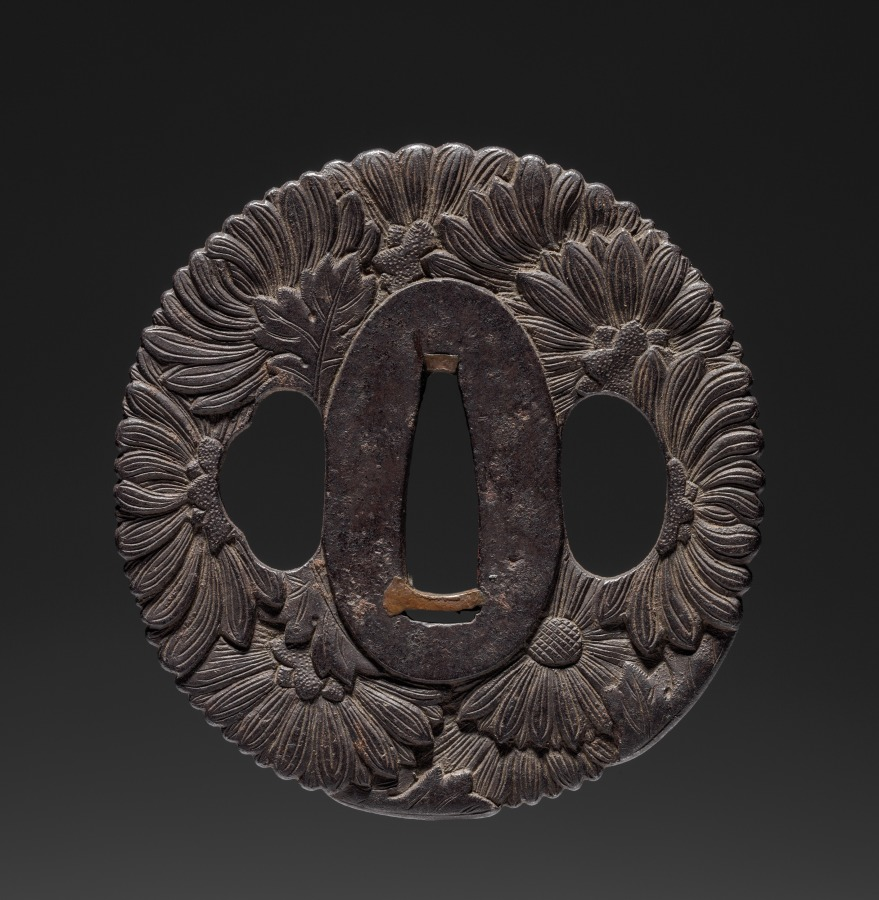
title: Sword Guard (Tsuba) with Chrysanthemums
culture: Japan, possibly Edo period (1615-1868)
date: c. 1615–1868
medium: iron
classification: Arms and Armor